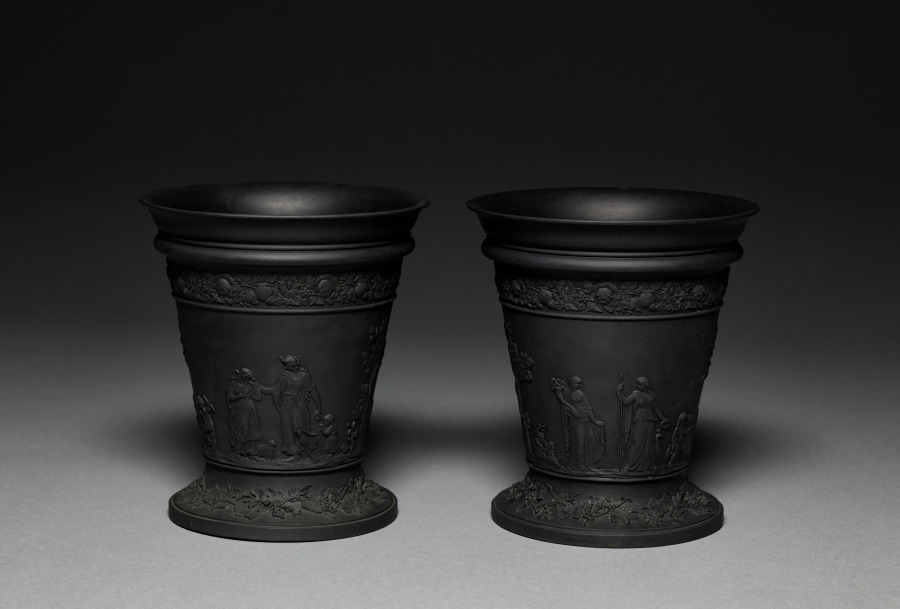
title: Pair of Jardinieres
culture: England, Staffordshire, 18th century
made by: Wedgwood Factory (British)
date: late 1700s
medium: black basalt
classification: Ceramic